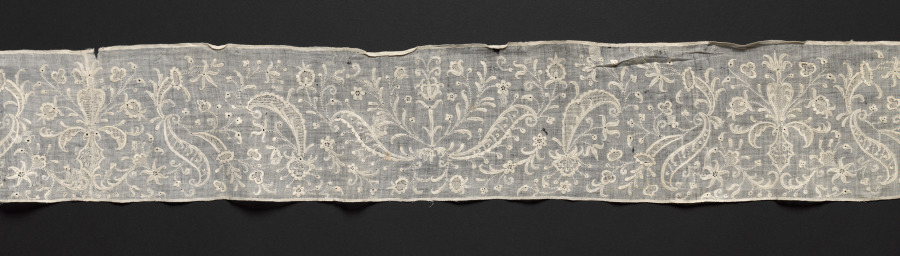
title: Band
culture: France(?)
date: 1700s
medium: Plain weave linen: needle lace (drawnwork) and embroidery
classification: Embroidery